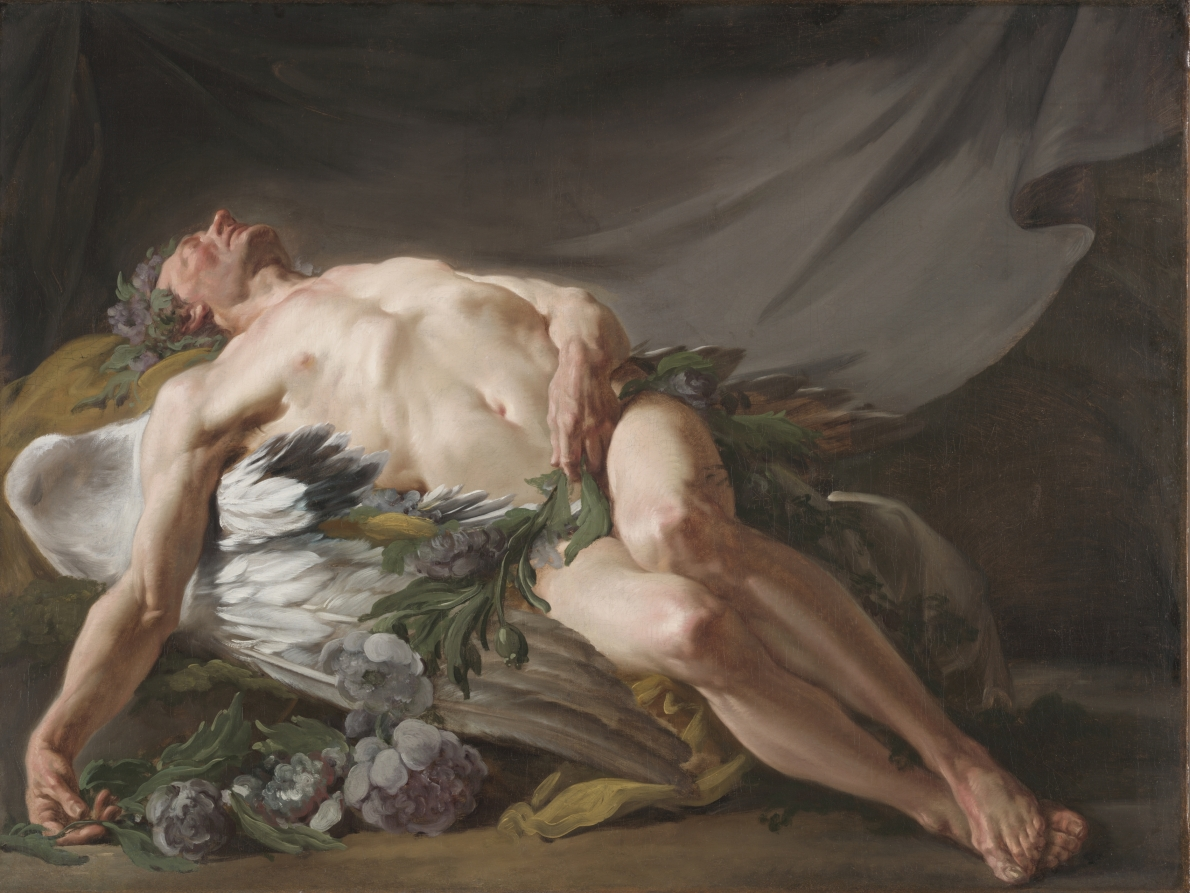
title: Sleep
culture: France, 18th century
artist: Jean Bernard Restout (French, 1732–1797)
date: c. 1771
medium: oil on canvas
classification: Painting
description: The tradition of painting nude male figures in a studio setting was the cornerstone of artistic practice, teaching artists to depict the human body in complex poses in order to create larger narratives. However, by the late 1700s, some artists began to see these studies as independent works of art. By adding the wings and the poppies, Restout transformed his study into a more specific subject, and he first exhibited the work in a privately organized exhibition in 1783 under the title of Morpheus, the god of sleep.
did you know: A source of inspiration for this painting was probably the Roman poet Ovid's Metamorphoses, which describes the god of sleep as living in a cave with sleep-inducing poppies at the entrance.